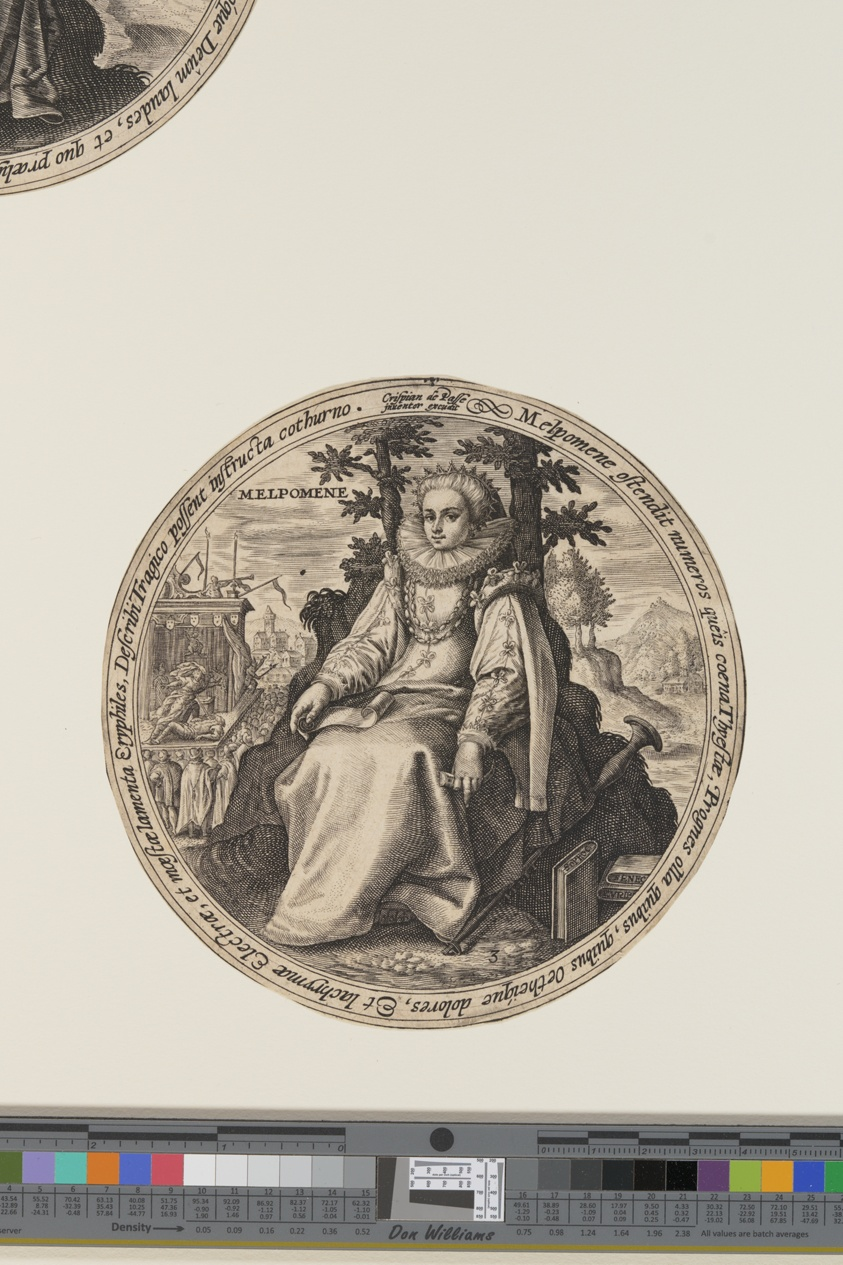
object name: Print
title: Melpomene, from The Muses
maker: Crispijn van de Passe I; Dutch, c. 1565–1637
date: c. 1590-1620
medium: Engraving on ivory laid paper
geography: Netherlands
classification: engraving; paper; print; prints and drawing